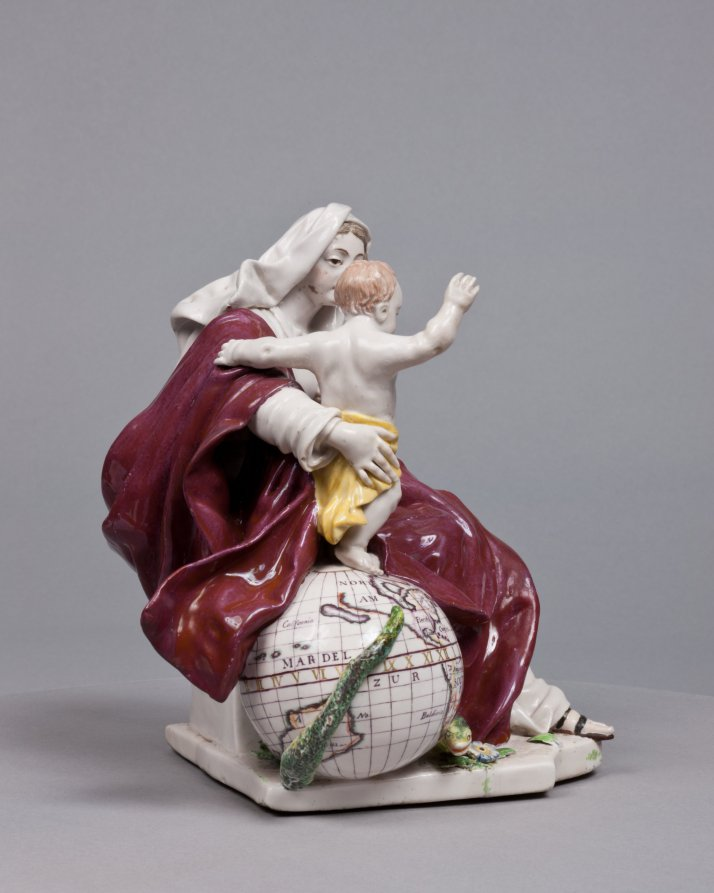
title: Madonna and Child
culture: England, Chelsea, 18th century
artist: Chelsea Porcelain Factory (Britain, London, 1745–84)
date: c. 1755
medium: porcelain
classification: Ceramic